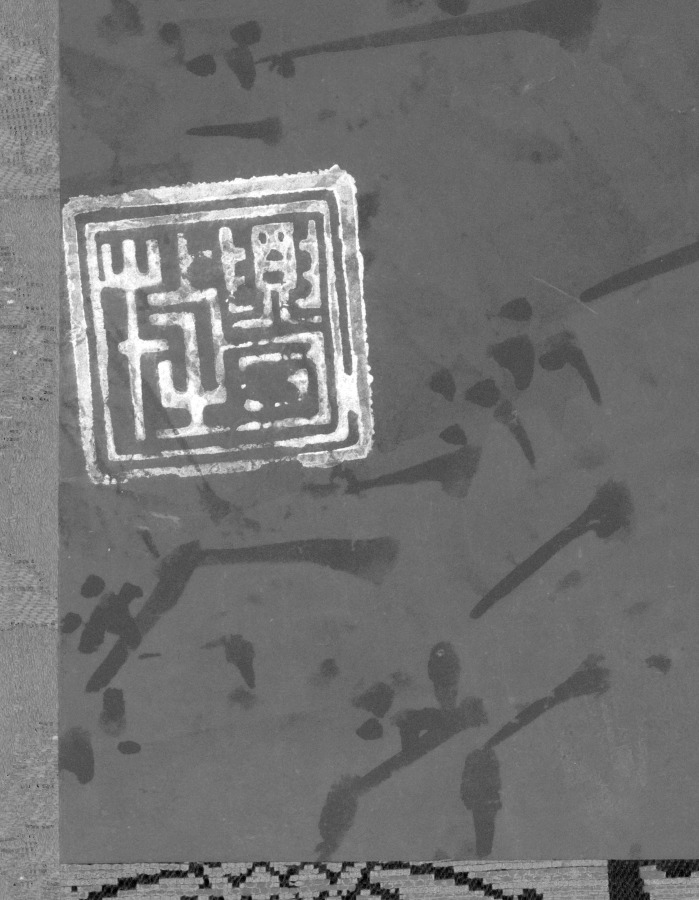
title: Female Daoist Figure in Landscape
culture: Japan, Muromachi period (1392–1573)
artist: Kōboku (Japanese)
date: early 1500s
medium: hanging scroll; ink on paper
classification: Painting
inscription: 「興牧」（朱文方印）